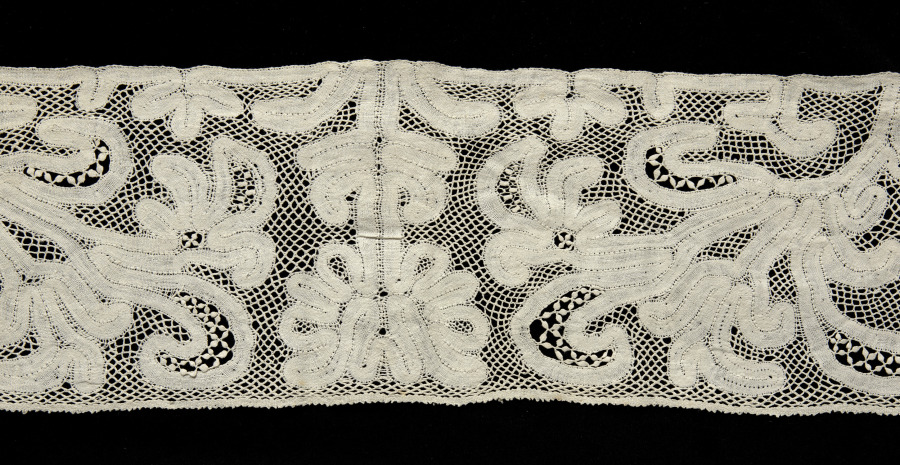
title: Lace Edging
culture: Italy, Abruzzi, Pescocostanzo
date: 1700s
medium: Linen: bobbin lace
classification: Lace